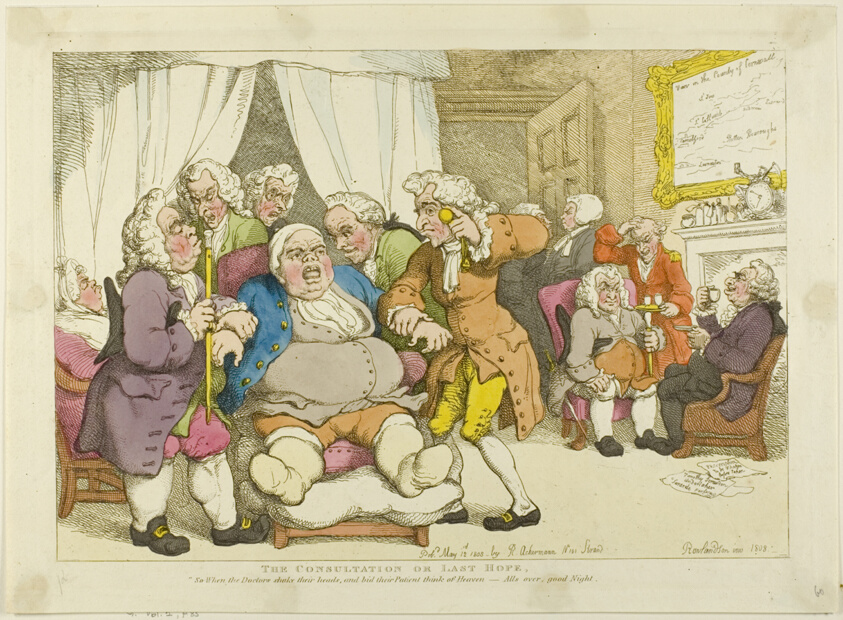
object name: Print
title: The Consultation or Last Hope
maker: Thomas Rowlandson (English, 1756-1827); published by Rudolph Ackermann (English, 1734-1834)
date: published May 12, 1808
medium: Hand-colored etching on ivory wove paper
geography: England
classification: etching; print; prints and drawing